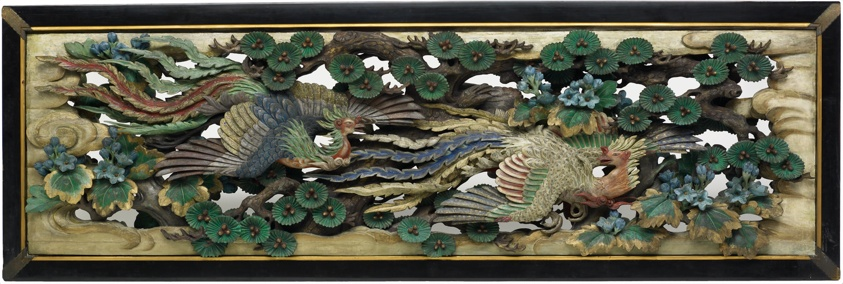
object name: Decorative Arts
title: Transom panels (ramma) from the Phoenix Pavilion (Hooden)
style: Japanese (culture or style)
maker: Takamura Kо̄un (Japanese, 1852-1934)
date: 1893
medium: Wood with polychromy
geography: Japan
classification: wood; architectural fragment; asian art; decorative arts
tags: Chicago